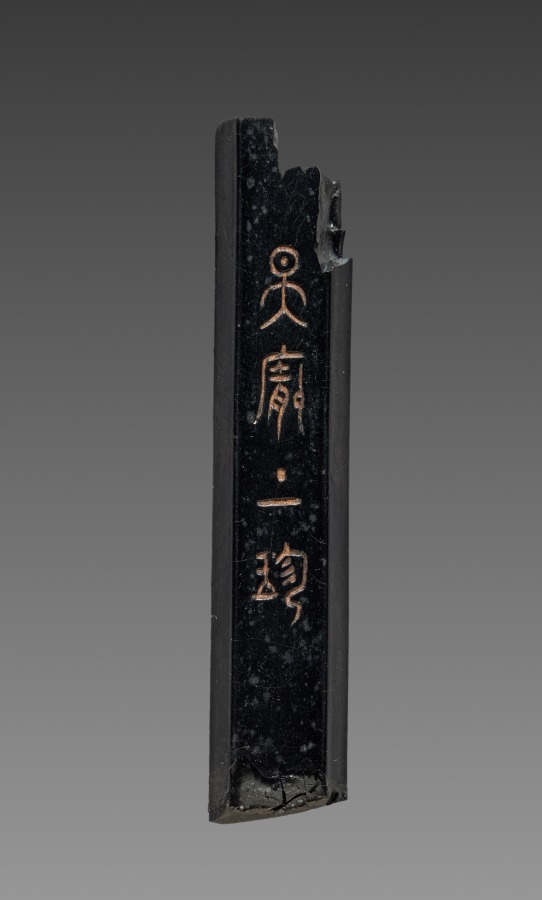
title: Ink Cake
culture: China, Qing dynasty (1644-1911)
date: 19th Century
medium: ink cake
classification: Miscellaneous